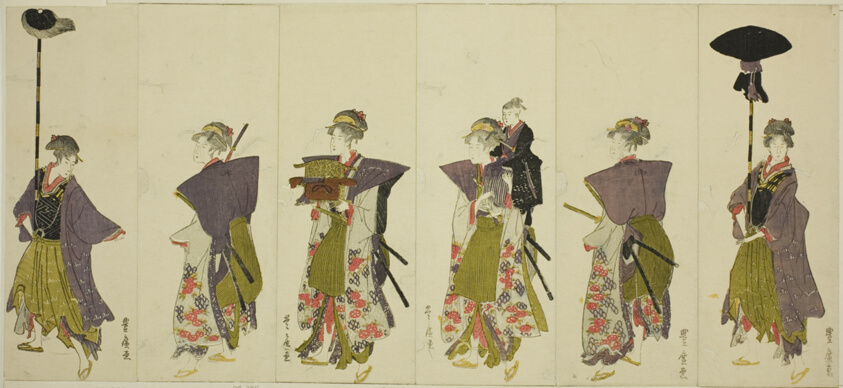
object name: Print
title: Parody of a daimyo procession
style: Japanese (culture or style)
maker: Utagawa Toyohiro (Japanese, 1773-1828)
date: c. 1805/07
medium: Color woodblock prints; 6 of 12 sheets (see 1928.391-396)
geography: Japan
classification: print; asian art